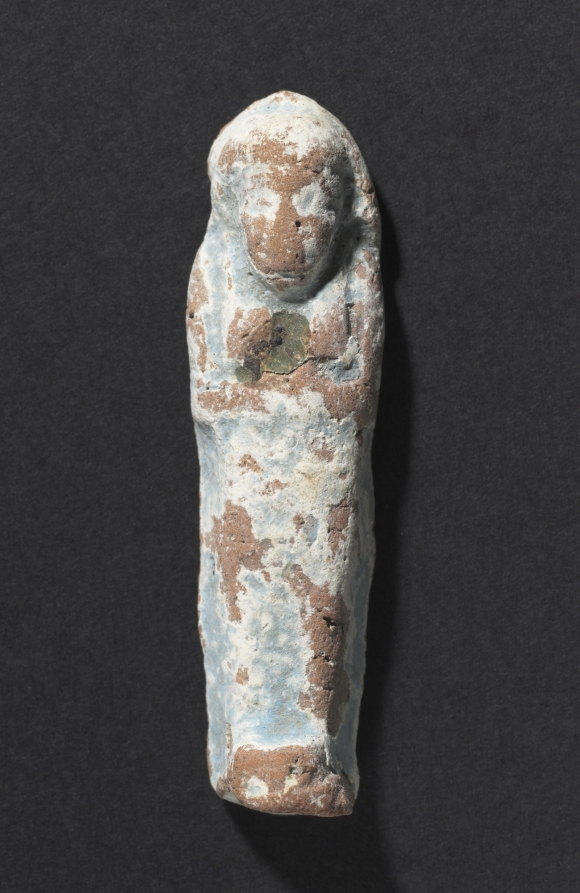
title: Shawabty of Ditamenpaankh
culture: Egypt, Late period (715–332 BCE), Dynasty 25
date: 715–656 BCE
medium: terracotta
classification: Funerary Equipment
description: High demand for shawabtys in the Late Period, a time when as many as 400 or more shawabtys were placed in the tomb with the deceased, gave rise to a specialized container for storing them: the shawabty box. This example is inscribed for the lady of the house, Ditamenpaankh, and was probably one of a pair originally made for her. The single-masted boat on the box's lid is perhaps an allusion to the pilgrimage of the deceased to the holy city of Abydos, the cult city of Osiris, king of the dead. The shawabtys inside are crude, mass-produced examples cast in an open mold. Made of terracotta, their blue paint imitates more costly shawabtys made of faience. As for the shawabty spell, it has been removed from its traditional location on the shawabty's front and relocated onto the sides of box, where it needed only to be written once, thus expediting production.